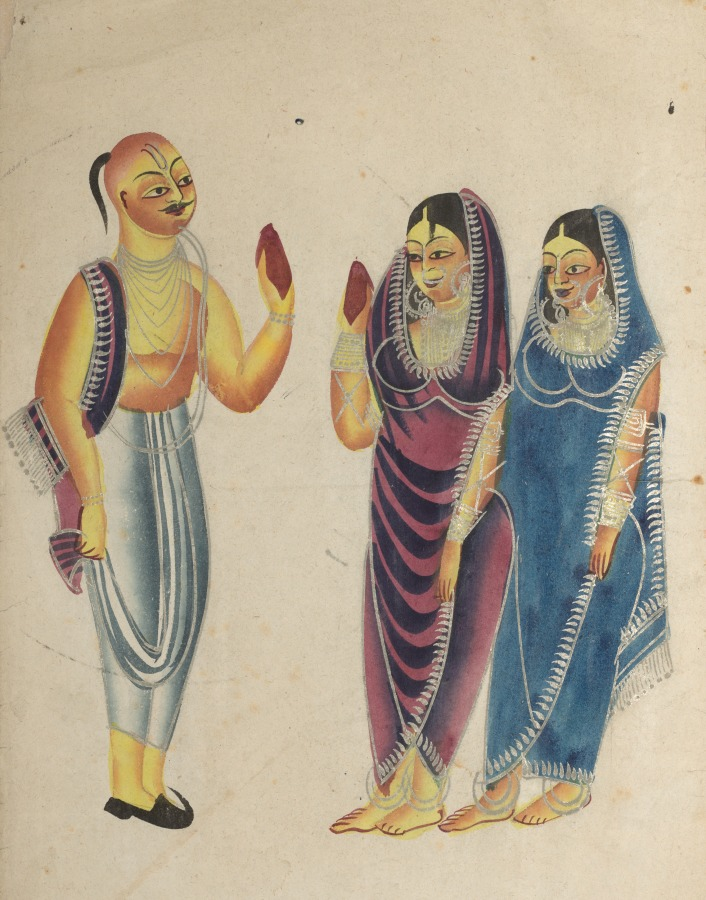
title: Vaishnava Devotee with Two Women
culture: Eastern India, Bengal, Kolkata, Kalighat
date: c. 1890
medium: Gum tempera, graphite, ink, and tin on paper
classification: Painting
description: Here a devotee of Vishnu is wearing shoes and is depicted with some irony as being a fashionable devotee, or perhaps merely posing as orthodox. Kalighat artists often targeted hypocritical Vaishnava mendicants whose intentions with unsuspecting women were far from innocent. On his forehead one finds sectarian marks worn by worshippers of Vishnu. The man’s right hand and one of the women’s left hands, both held aloft, are colored red, possibly to indicate that they were adorned with henna.